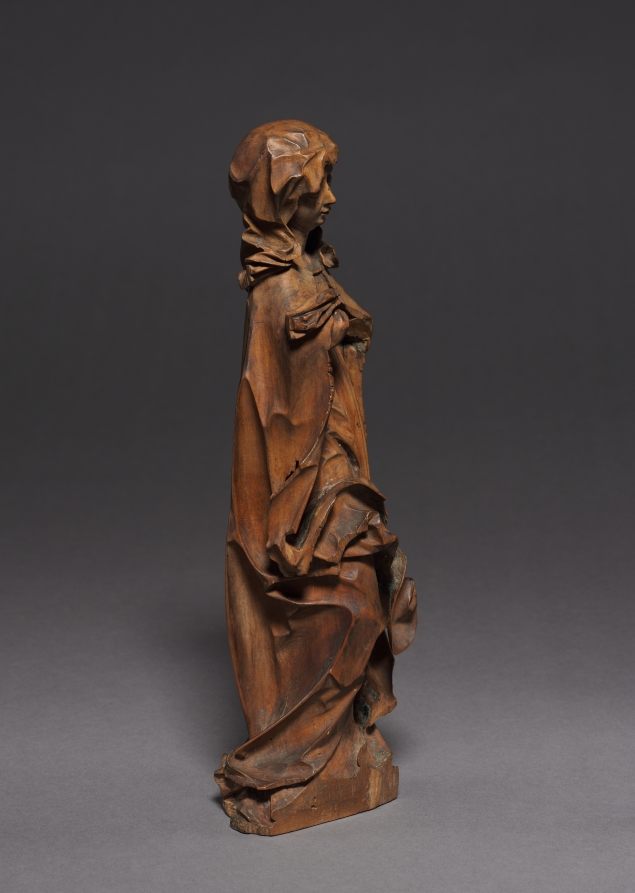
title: Mourning Virgin from a Crucifixion Group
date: about 1620/40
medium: pearwood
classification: Sculpture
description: This statuette once formed part of a Crucifixion group intended for a domestic shrine or chapel. Such ensembles were not only used for private devotion and meditation, but were also collected as works of art. This work was long attributed to the Nuremberg artist Veit Stoss. In fact, the carver imitated forms from his repertoire. However, the concave folds do not occur before 1600. The sculpture was created at a time when the appreciation for Albrecht Dürer, the most famous German painter of his time, was also experiencing a renaissance.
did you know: Looking closely, you can see that the sculptor carved tears under Mary's eyes. They show her pain over Christ hanging on the cross.